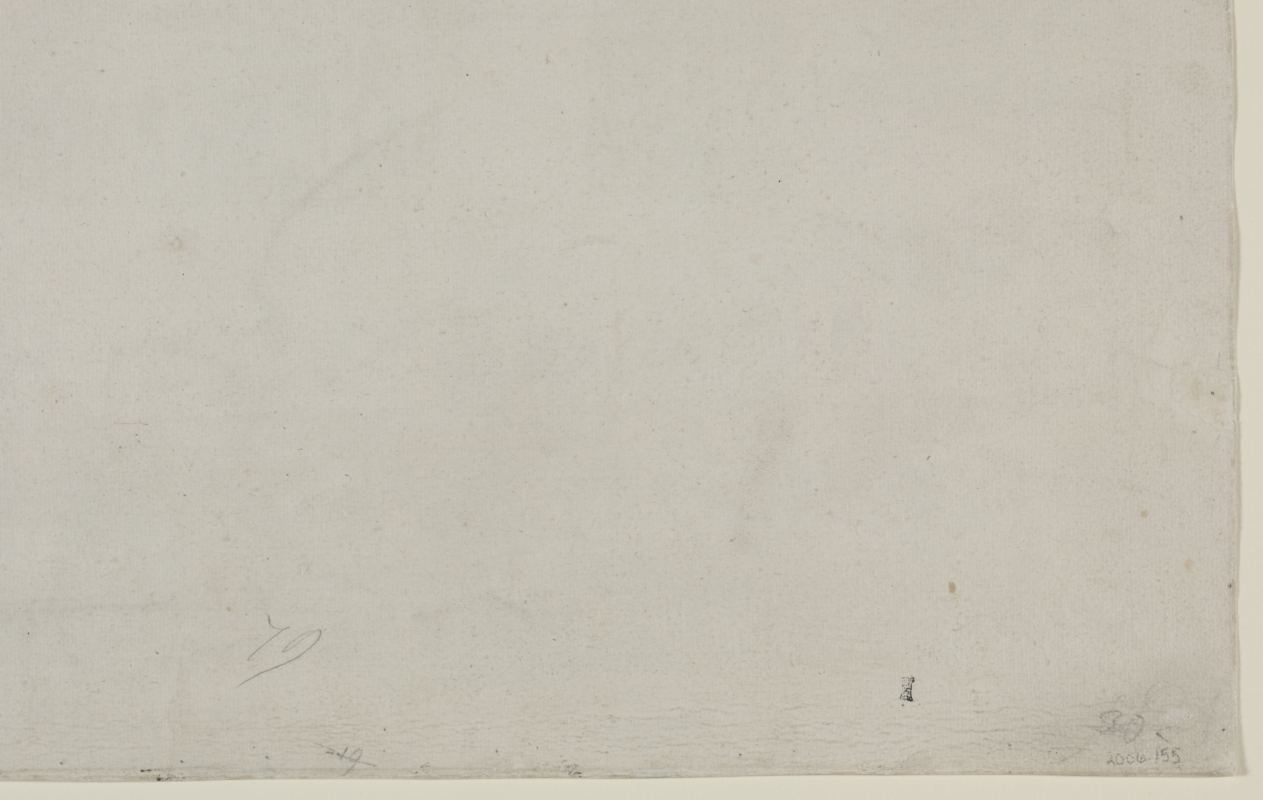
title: Ecce Homo. Christ Presented to the People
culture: Netherlands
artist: Rembrandt van Rijn (Dutch, 1606–1669)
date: 1655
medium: drypoint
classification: Print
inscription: Recto, upper left, in graphite: 79; lower left: FPS. Verso, in purple ink: Prince of Liechtenstein or Colnaghi for Liechtenstein stamp; in black ink, Zinser stamp, castle tower (rook chess piece); along side, in graphite: No. 36; along top: (illegible) name; upper left, in graphite: No 79 P(?) G (?) La Second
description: Rembrandt was an experimental and innovative printmaker and the first to execute works in pure drypoint on this monumental scale. Drypoint produces blurred lines and rich, velvety shadows, but these effects are lost as the plate wears. A limited number of rich impressions exist like this fine example of the fifth state, which demonstrates how Rembrandt redefined the expressive potential of printmaking. Rembrandt’s habit of drawing from life made him a keen observer of behavior and body language, endowing his biblical scenes with a human dimension and veracity not seen previously. The throng in Christ Presented to the People represents a cross section of the population and reflects the pictorial tradition that common humanity condemned Christ. Large areas of the imposing building, symbolizing the crushing weight and authority of the state, remain unworked so that blank white paper seems radiant in contrast to rich black shadows.